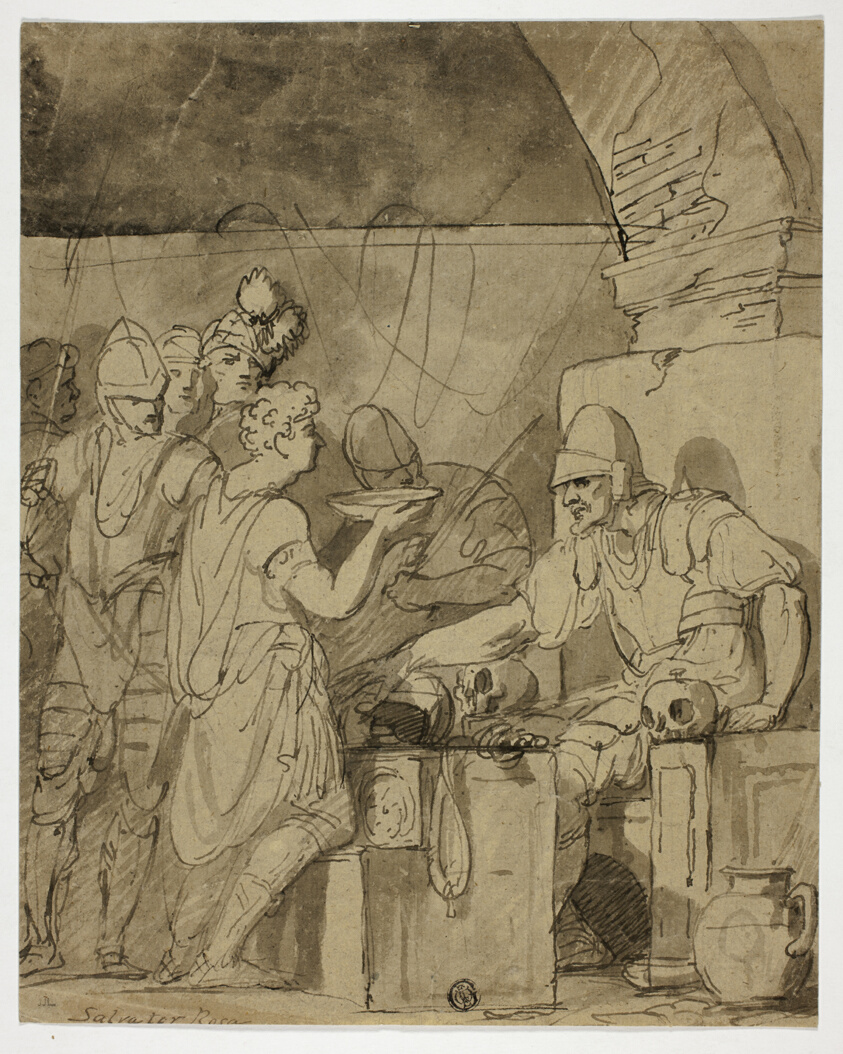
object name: Drawing and Watercolor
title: Soldiers Refeshing Themselves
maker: Possibly after John Hamilton Mortimer (English, 1740-1779); or after Salvator Rosa (Italian, 1615-1673)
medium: Pen and black ink and brush and gray wash on tan laid paper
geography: England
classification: pen and ink drawings; paper; drawings (visual works); prints and drawing; brush and wash